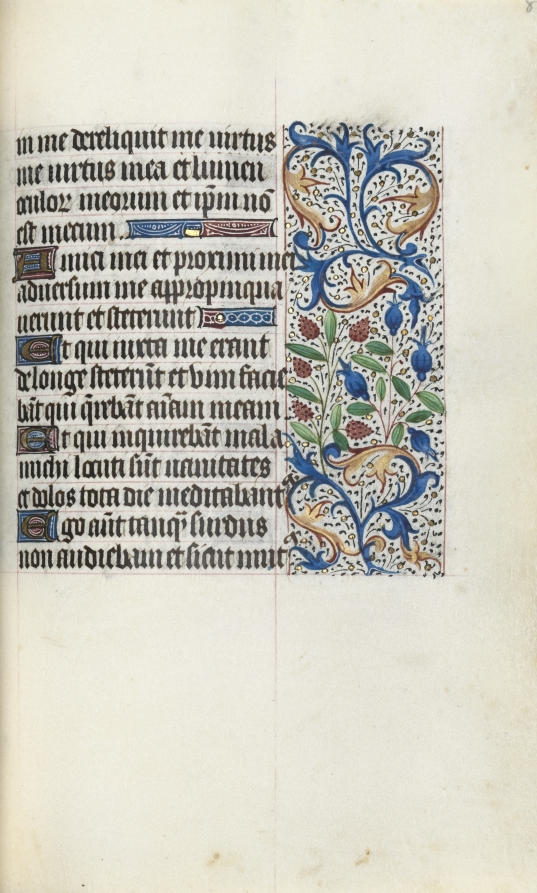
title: Book of Hours (Use of Rouen): fol. 84r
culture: France, Rouen, 15th century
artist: Master of the Geneva Latini (French, active Rouen, 1460–80)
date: c. 1470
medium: ink, tempera, and gold on vellum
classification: Bound Volume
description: In the late 1400s and early 1500s Rouen was an established and important center of book production. The city’s cathedral had a wealthy chapter that spent large sums of money to commission books and to maintain its extensive library. The stationers and booksellers would have likely been concentrated in or near the cathedral precinct. This artist, named after a manuscript now in Geneva, was Rouen’s principal illuminator during the second half of the 1400s.